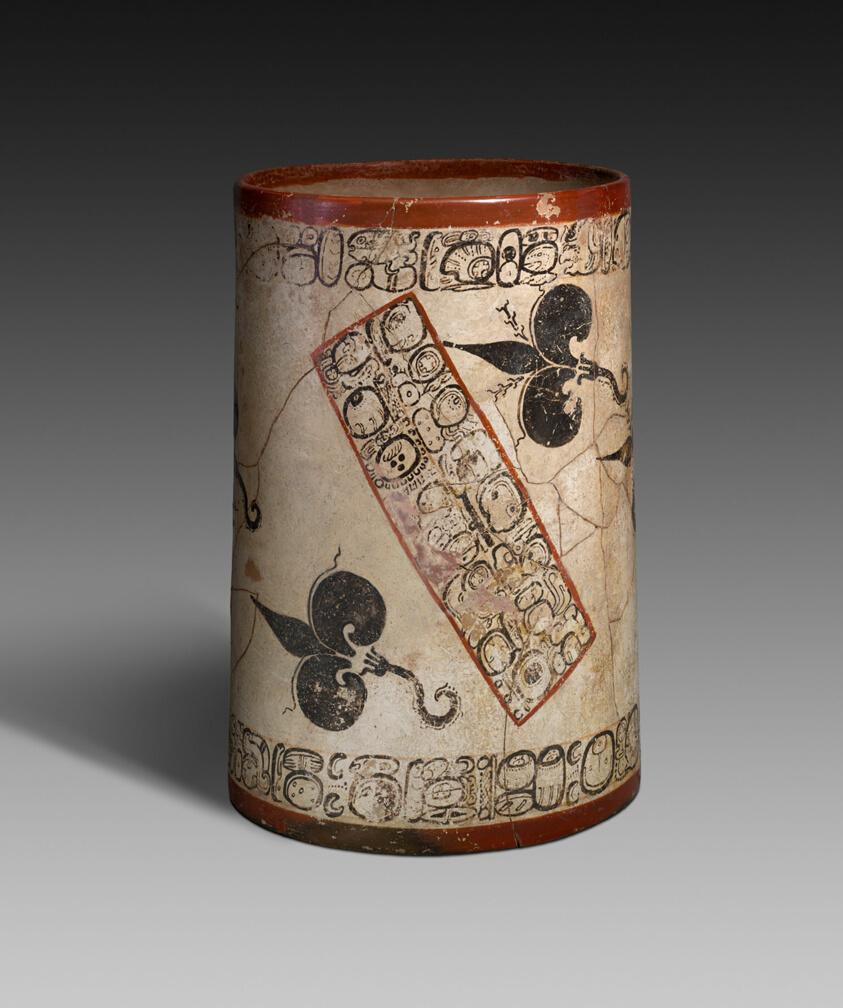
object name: Vessel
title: Water-Lily Vessel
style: maya, classic, mesoamerican, Pre-Columbian, americas, mayan, late classic, Arts of the Americas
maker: Ah Maxam; Maya, active mid-/late 8th century; Vicinity of Naranjo, Petén region, Guatemala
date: 750–800 CE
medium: Ceramic and pigment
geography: Petén department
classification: ceramics; earthenware; vessel; art of the americas; vessel for serving drinks; inscription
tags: waterlilly, artists, flowers, geneology, parents, underworld, underwater